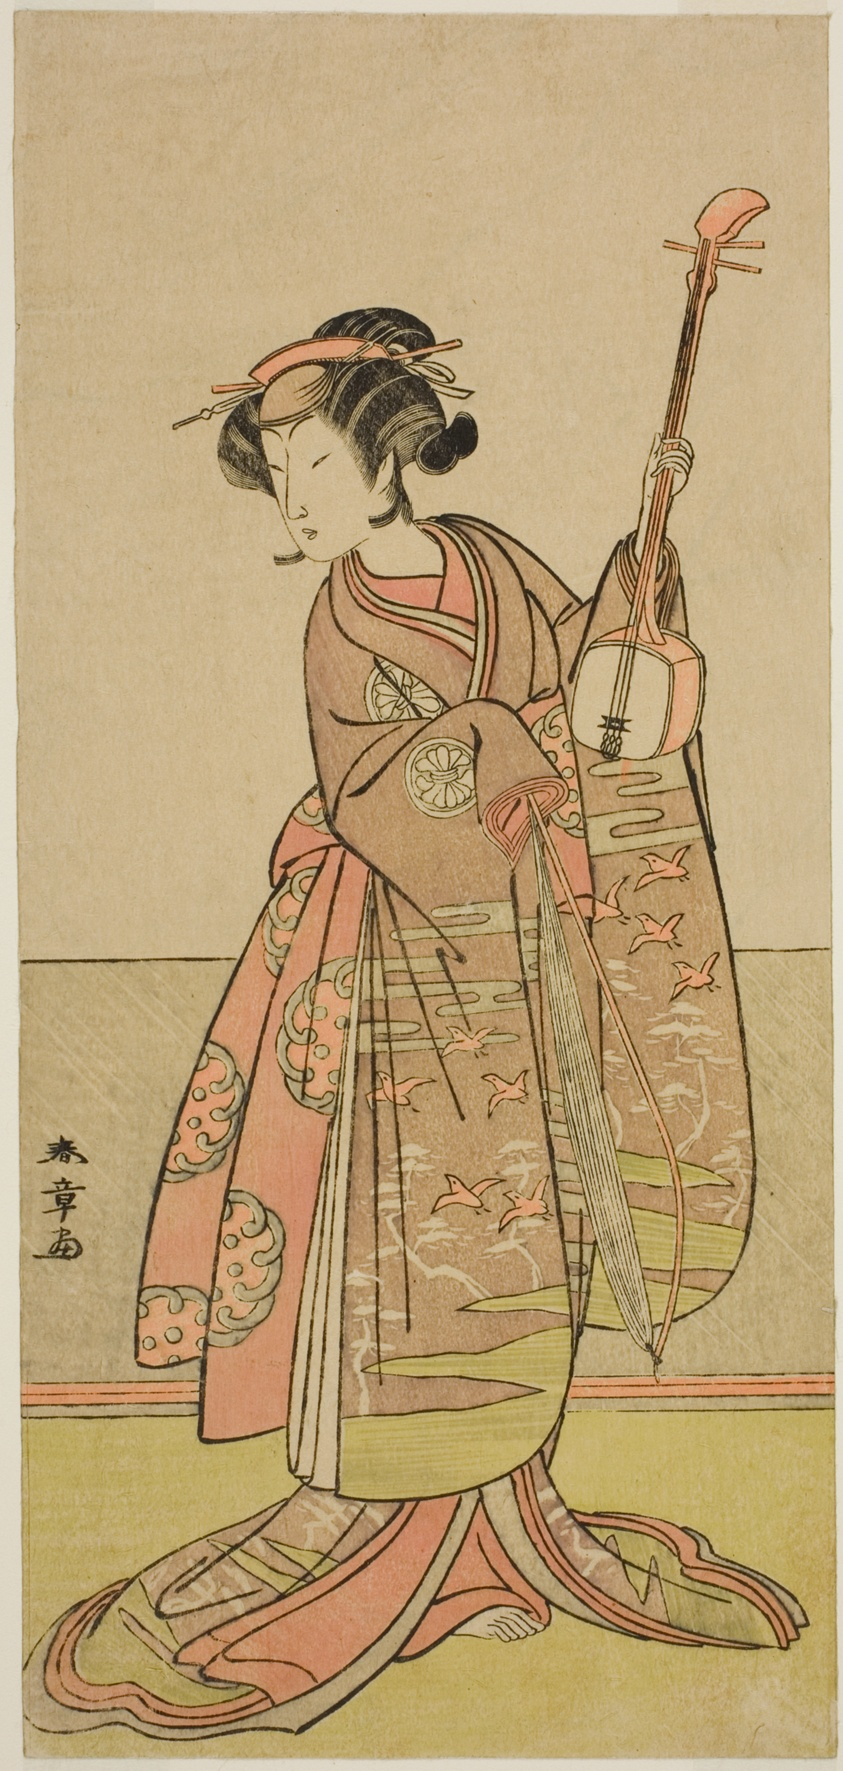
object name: Print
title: The Actor Segawa Yujiro I in an Unidentified Role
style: Japanese (culture or style)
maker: Katsukawa Shunsho 勝川 春章; Japanese, 1726-1792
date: c. 1775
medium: Color woodblock print; hosoban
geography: Japan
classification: woodblock print; print; asian art